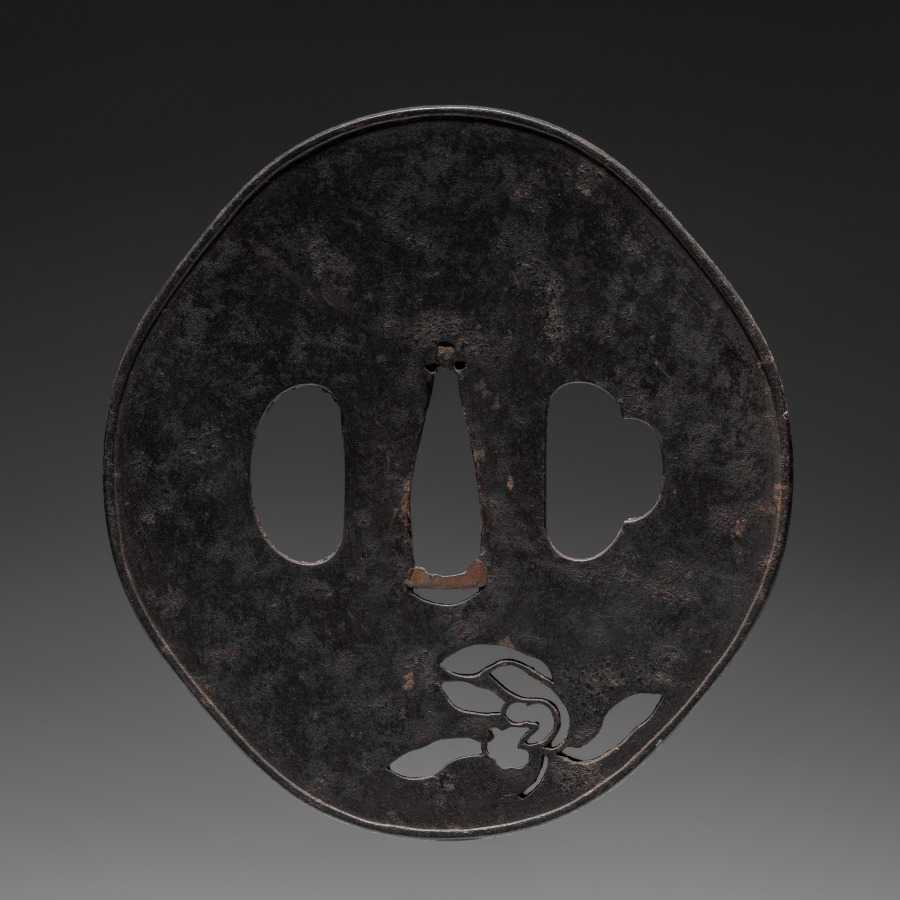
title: Sword Guard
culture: Japan, Edo period (1615–1868)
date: early 1800s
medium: iron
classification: Arms and Armor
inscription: signed: 一貫斎、眠龍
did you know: This sword guard has been attributed to the Otsuki school.